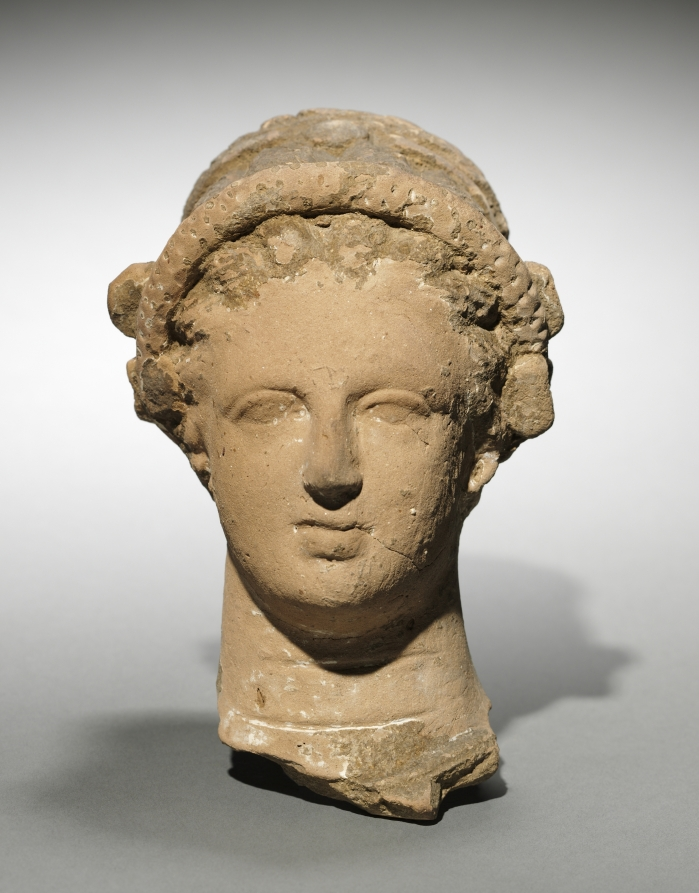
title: Head of a Woman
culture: Greece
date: 400s BCE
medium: terracotta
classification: Sculpture